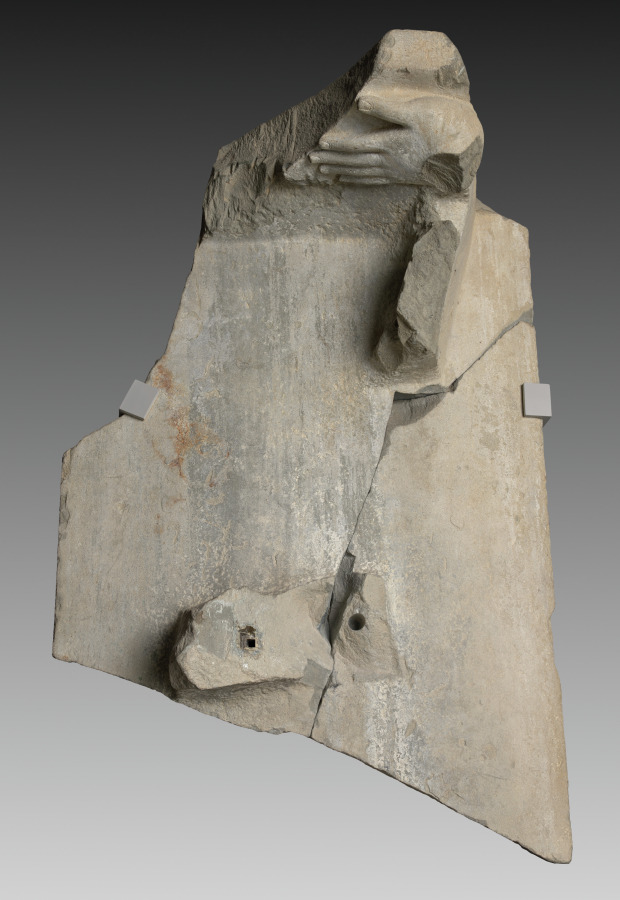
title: Upper stele with hand for Krishna Lifting Mount Govardhan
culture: Southern Cambodia, Takeo Province, Phnom Da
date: c. 600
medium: Sandstone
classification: Sculpture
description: This masterwork of early Cambodian sculpture shows the Hindu god Krishna effortlessly holding aloft a mountain to protect his fellow villagers and herds from torrential storms sent by a jealous old god. It is one of eight monumental monolithic figures recovered from a two-peaked mountain in the floodplains of the Mekong River delta, on the outskirts of the ancient urban center of Angkor Borei.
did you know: Gold earrings were once fastened to the sculpture using holes in the figure's earlobes.